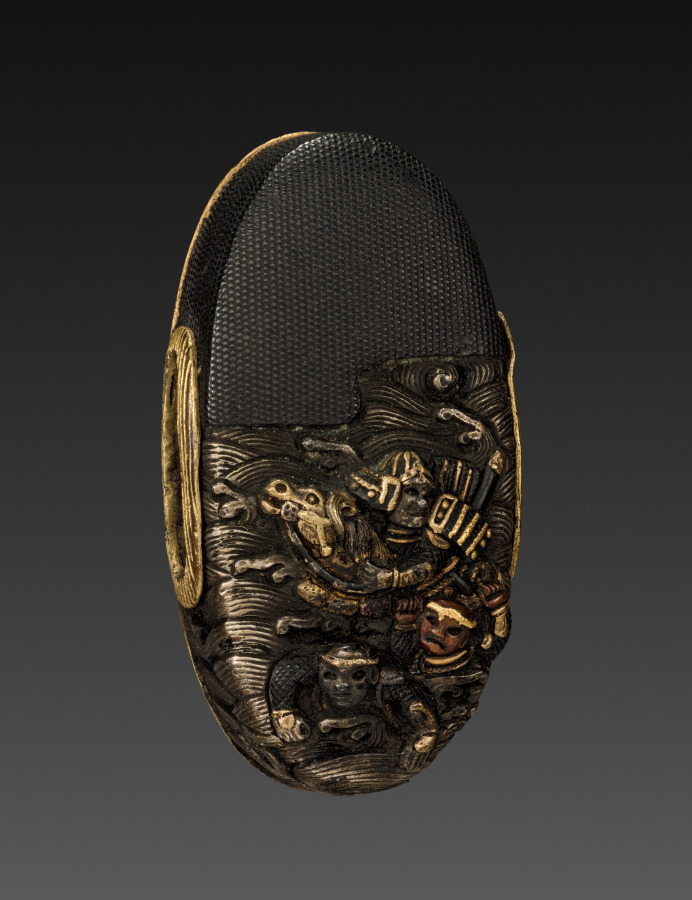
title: Sword-Hilt Pommel (Kashira)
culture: Japan, Edo period (1615–1868)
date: 1700–1850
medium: shakudo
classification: Arms and Armor